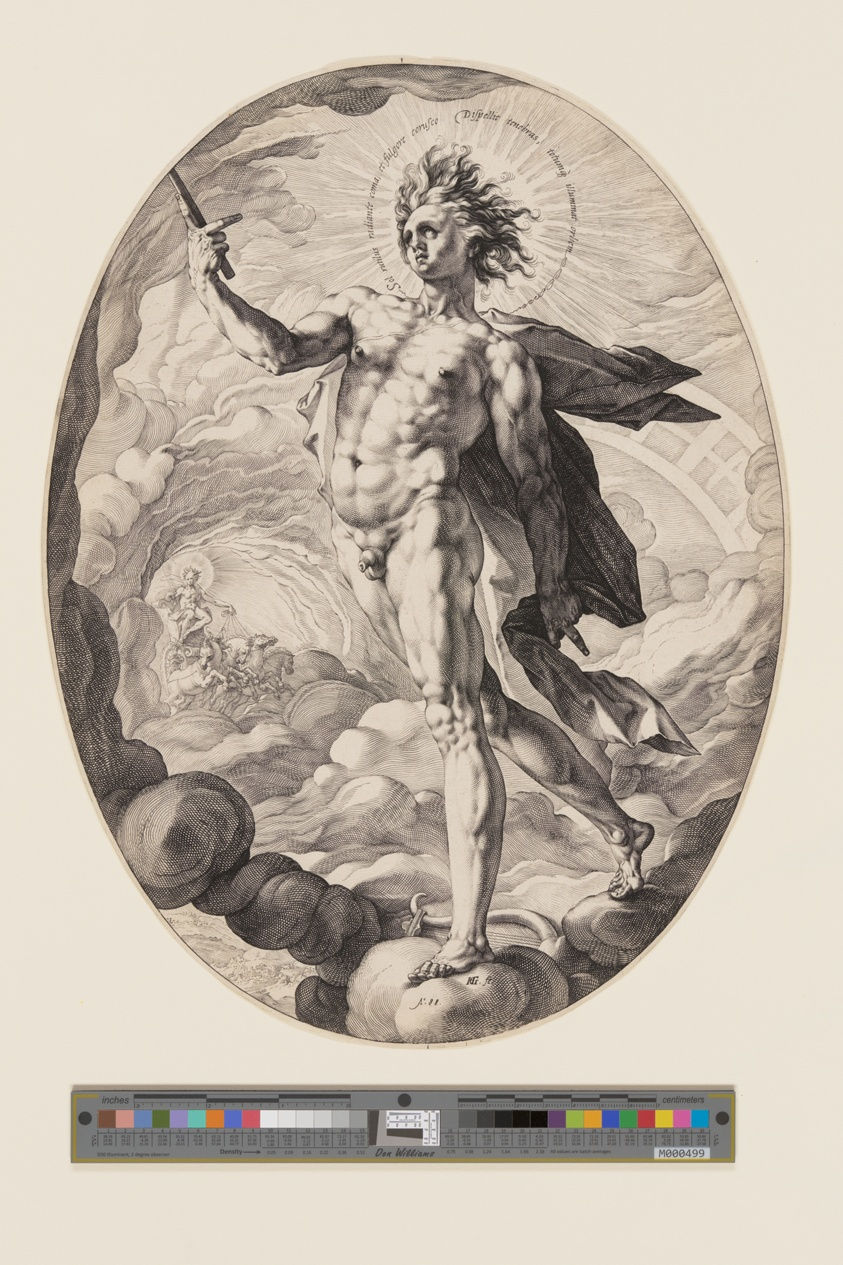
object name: Print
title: Apollo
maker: Hendrick Goltzius (Dutch, 1558–1617)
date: 1588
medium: Engraving on ivory laid paper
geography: Netherlands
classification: engraving; paper; print; prints and drawing